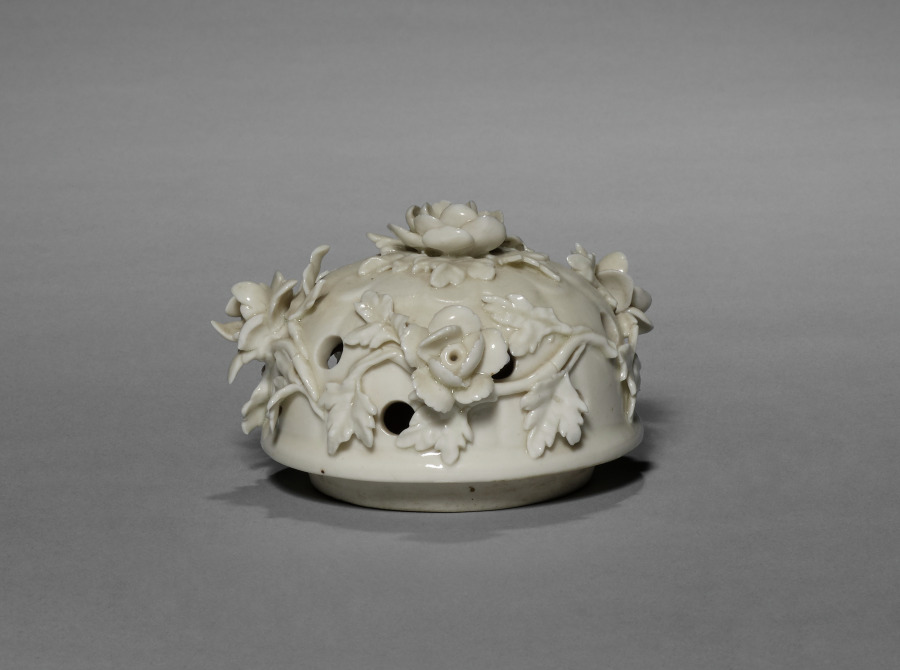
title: Cover for a Potpourri Vase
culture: France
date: 1860–80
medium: blanc-de-chine porcelain; gilt bronze mount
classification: Ceramic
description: This cover is part of a pair of covered vases that were created to contain potpourri, a mixture of flowers, herbs, and spices emitting ambient fragrance. This specific function offered a particularly fertile ground for the development of French porcelain from the mid-1700s, as manufactories experimented with forms, surface ornamentations, and placement of perforations. Produced by the firm of Edmé Samson in the 1800s, the vases pay homage to this history. While using updated technique and material, as well as more exuberant decorations, these vases draw upon designs by earlier innovators such as the Saint-Cloud manufactory.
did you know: Potpourri vases always have holes in the top to let the scent of dried spices and flowers contained within freshen the air around them.